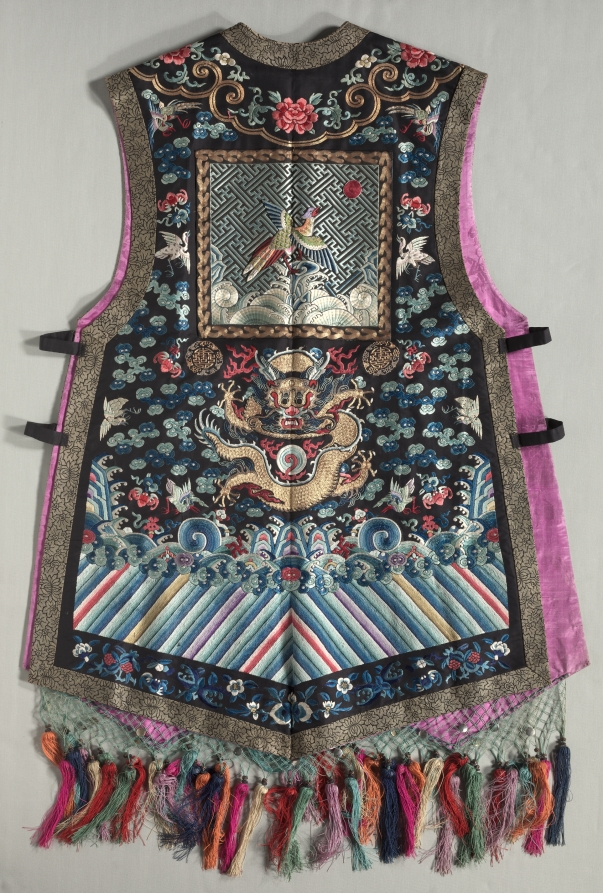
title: Woman's Bridal Dress, Tabard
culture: China, Qing dynasty (1644-1911)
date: 1800s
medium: Silk, gilt-metal thread; embroidery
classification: Garment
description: This three-piece bridal dress includes a dragon jacket, pleated skirt, and tabard, a short loose-fitting sleeveless vest. The ensemble reveals the high rank of her husband even though it did not fall under the scope of the Qing Dynasty sumptuary laws. The three-quarter-length sleeveless tabard completes the outfit, with a front closure, open sides secured by cloth bands, and a colorful tasseled fringe around the hem. Dragons, water, and clouds are embroidered on the silk ground.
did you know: A rank badge applied on the front and back shows that the bride married a man of high official rank.